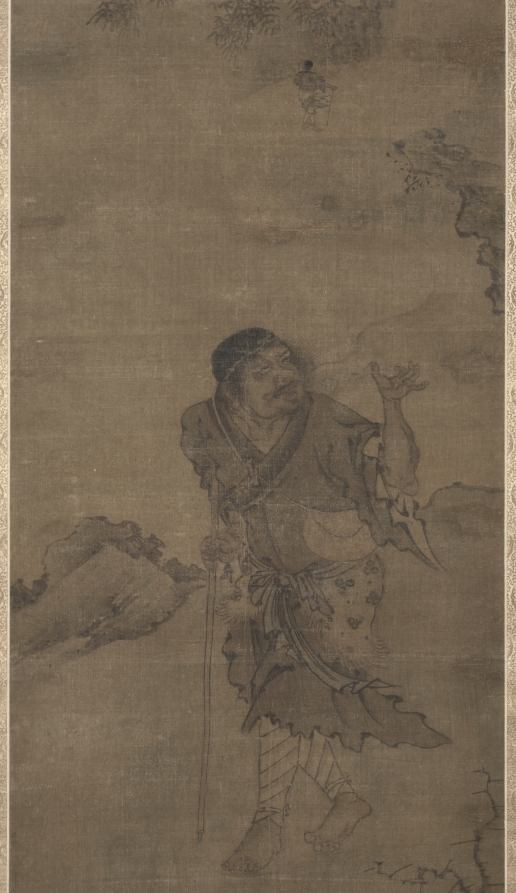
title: Li Tieguai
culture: China, Yuan dynasty (1271-1368)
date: 1300s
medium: Hanging scroll; ink and color on silk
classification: Painting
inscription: Inscribed in upper left corner: The universe which has no limit/ Is all collected in the cloth bag/ At the roadside which has no beginning or end/ One floats up to the blue sky.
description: It is said that Li Tieguai’s ethereal self visited the deified Laozi but when he returned, he found that his own body was burned. He had to inhabit the corpse of a person who used a crutch to walk, and thus gained his name Tieguai—the Iron Crutch. The painting depicts Li Tieguai after he took possession of the body, with the iron staff in his hand. As Li exhales, he blows a small Li Tieguai in the air, showing the immortal’s ability to send his spirit on journeys.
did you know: Li Tieguai is one of the Eight Daoist immortals.